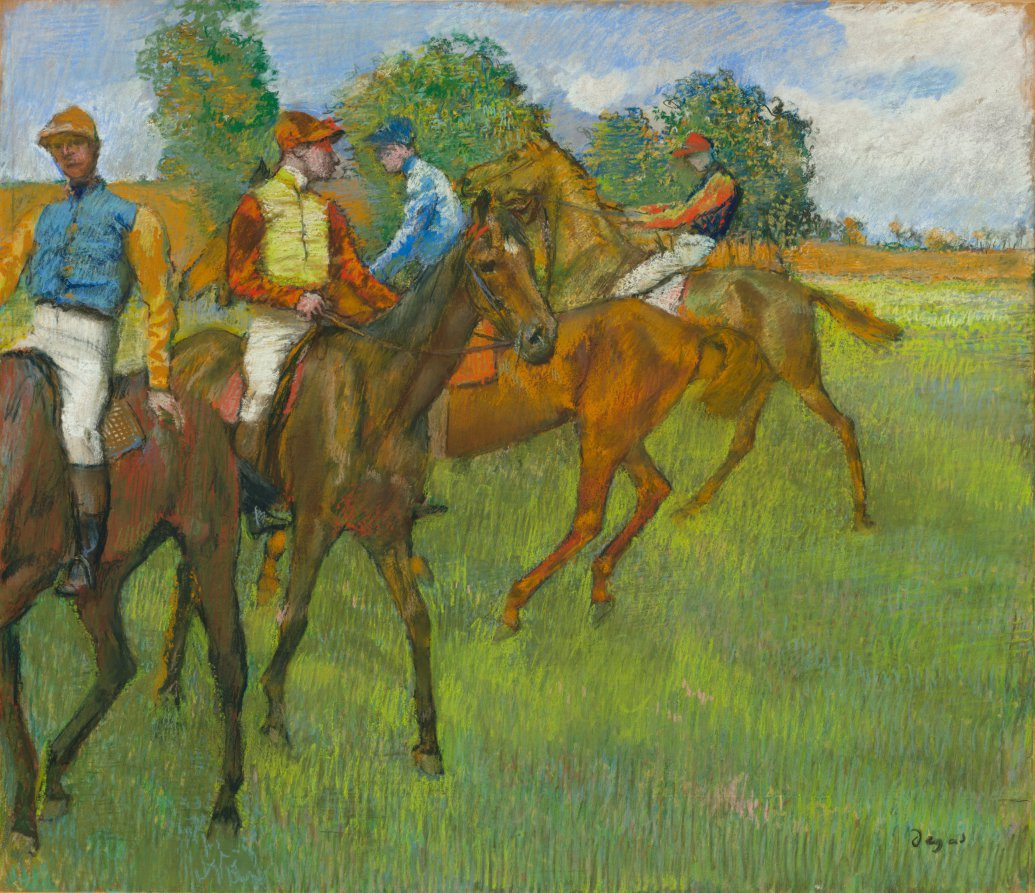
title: Before the Race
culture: France, 19th century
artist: Edgar Degas (French, 1834–1917)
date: c. 1887–89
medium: pastel with charcoal underdrawing on tracing paper mounted on cardboard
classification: Drawing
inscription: signed, lower right, in black pastel: Degas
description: Degas returned to the theme of horse and rider time and again throughout his career. Scholars believe that he executed the first version of this composition of four jockeys on horseback in a charcoal and pastel drawing. Several years later, he traced the composition, reversing its orientation to create the highly finished Cleveland pastel. The palette is intensified, the distance between the second and third jockeys is increased, and the foliage along the horizon has been added to suggest a lush spring day.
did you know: When creating the series to which this pastel belongs, Edgar Degas was inspired by the 19th-century photographer Eadweard Muybridge, who attempted to record motion in static images.